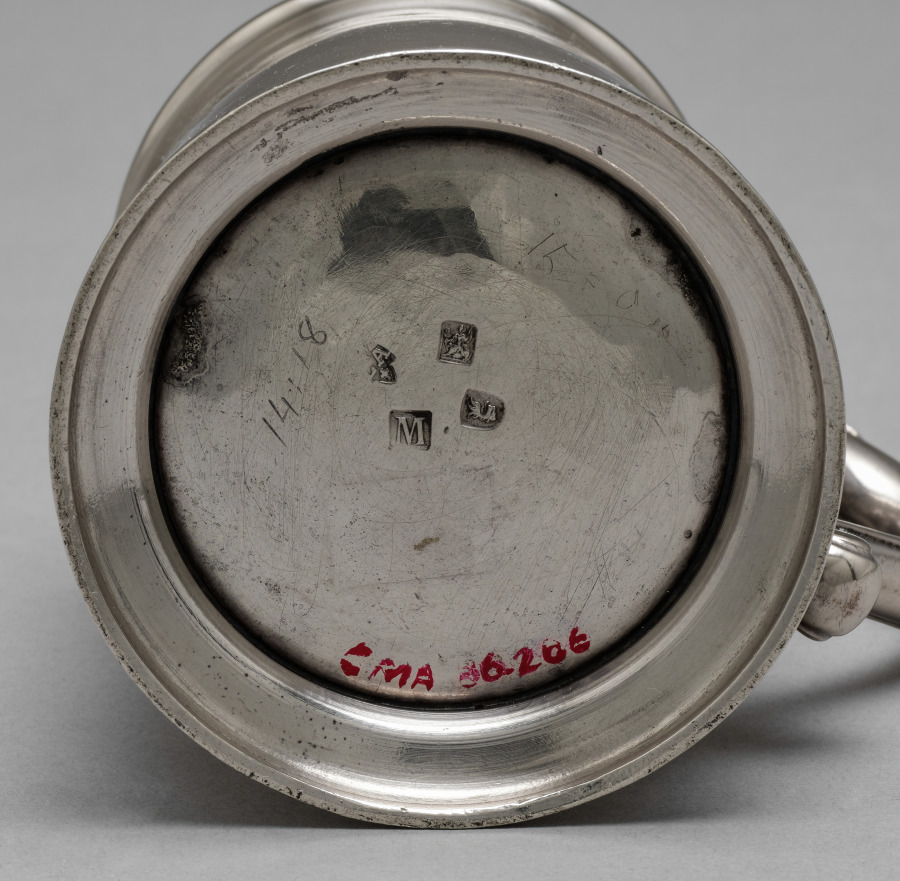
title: Cann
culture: England, 18th century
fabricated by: Paul Jacques de Lamerie (British, 1688–1751)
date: 1727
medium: silver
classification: Silver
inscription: engraved on front: crest of griffin's head erased and mantling in contemporary style. (This crest was widely used and therefore the first owner cannot be identified.)